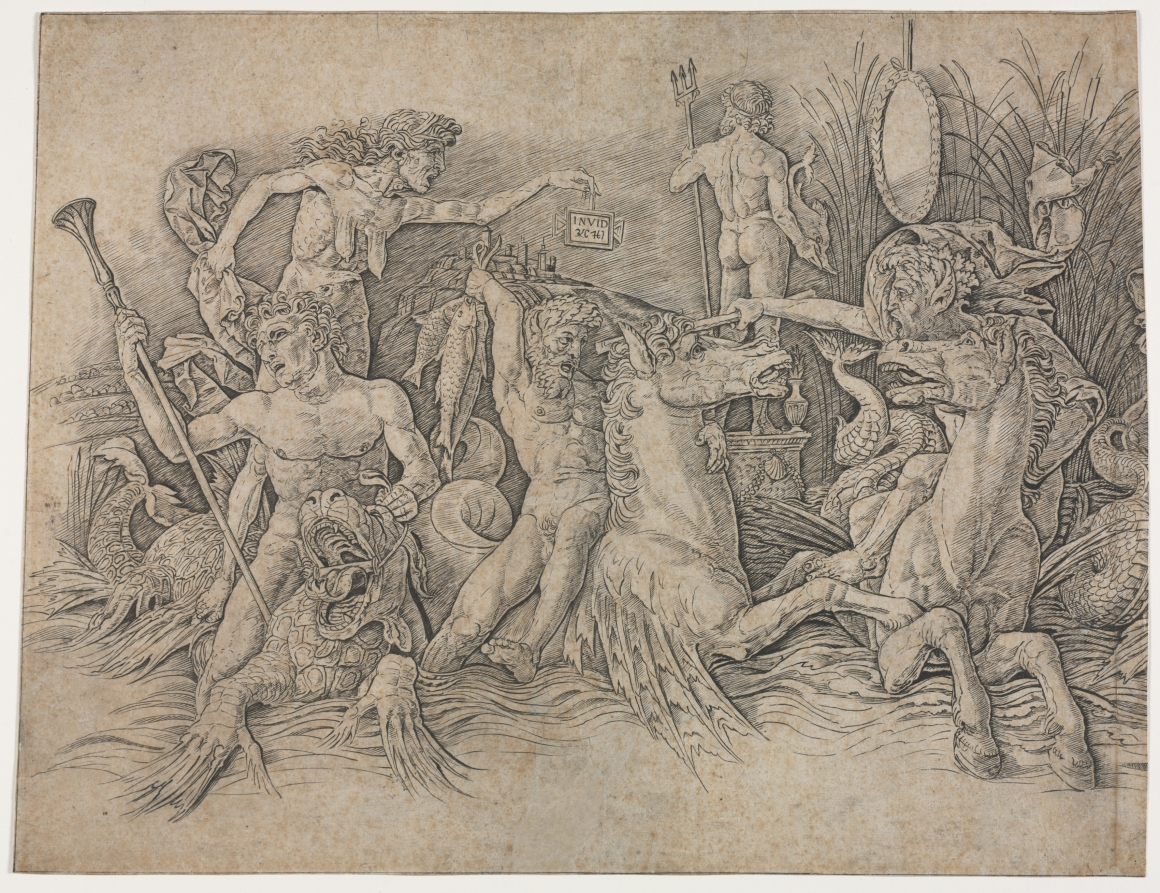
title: Battle of the Sea Gods - left portion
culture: Italy, 15th century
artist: Andrea Mantegna (Italian, about 1431–1506)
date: c. 1485–88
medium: engraving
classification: Print